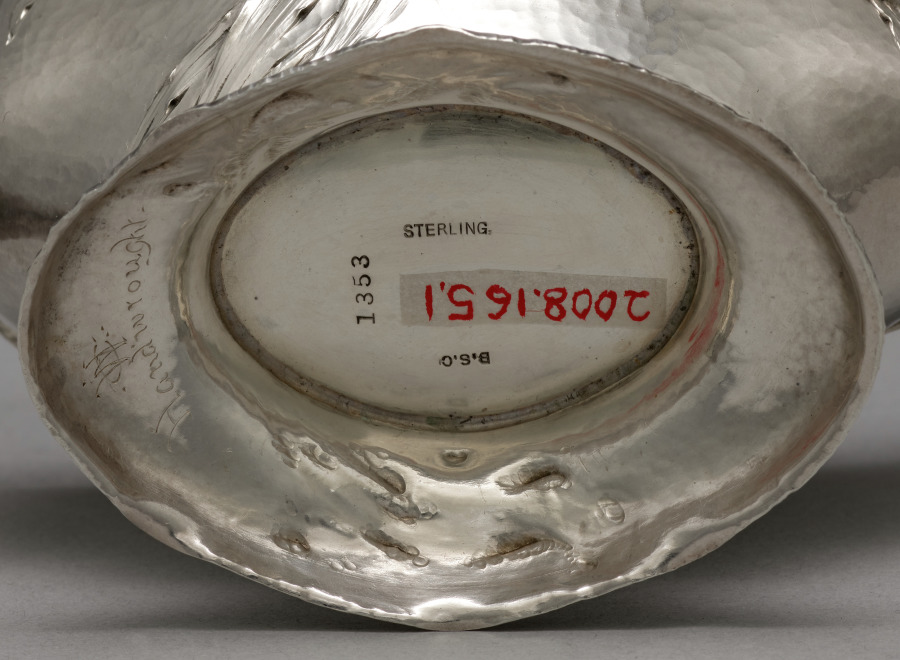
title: Sauce Boat and Tray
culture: America, Rhode Island, 19th century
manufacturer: Barbour Silver Company (American)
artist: attributed to William Christmas Codman (British, 1839–1921)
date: c. 1890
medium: silver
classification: Silver